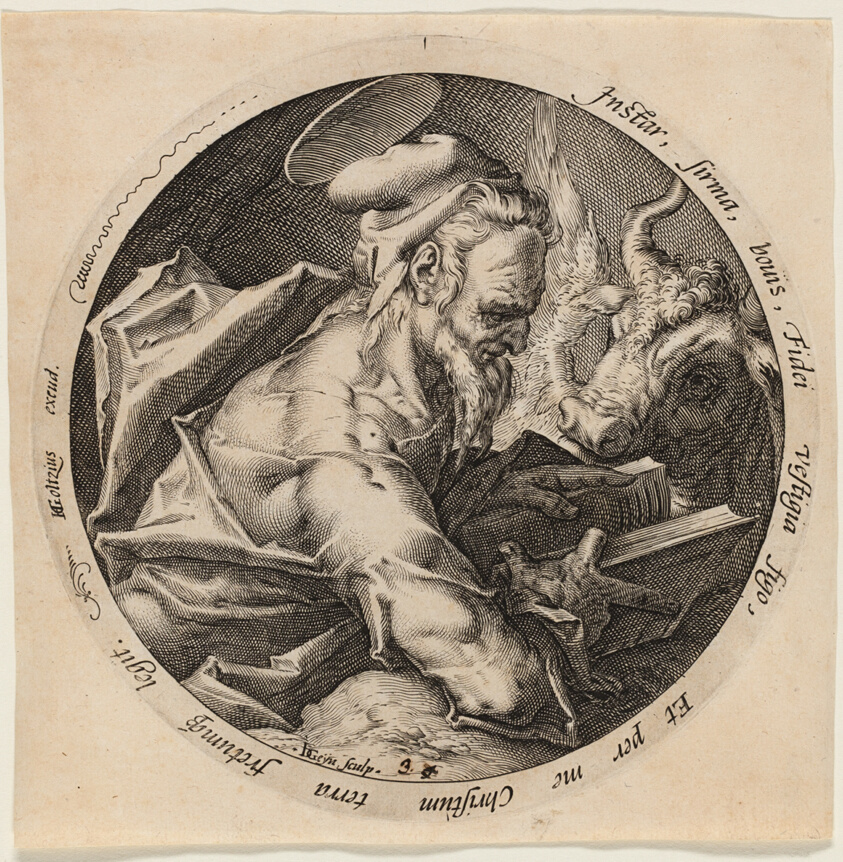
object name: Print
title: Saint Luke, plate three from The Four Evangelists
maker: Jacob de Gheyn II (Dutch, 1565-1629); after Hendrick Goltzius (Dutch, 1558-1617)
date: 1588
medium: Engraving in black on laid paper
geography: Netherlands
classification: engraving; paper; print; prints and drawing